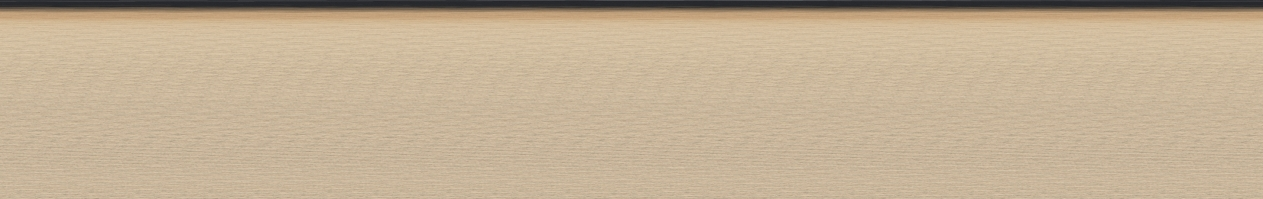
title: Dream Journey among Rivers and Mountains, no. 90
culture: China, Qing dynasty (1644-1911)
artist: Cheng Zhengkui (Chinese, 1604–1676)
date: 1658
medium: Handscroll; ink and color on paper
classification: Painting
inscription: 江山臥遊圖其九十, 青溪道人, 戊戌夏五。 [印] 程正揆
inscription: Title and inscription by Huang Yi 黃易 (1744–1802), and 3 seals.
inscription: 1 colophon and 9 additional seals: 3 seals of Dai Zhi 戴植 (active about 1821–1850); 1 colophon, dated 1914, and 3 seals of Yan Shiqing 顏世清 (1873–1929); 3 seals of Wang Nanping 王南屏 (1924–1985).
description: Cliffs and waterfalls interspersed with trees and dotted vegetation are spread over this handscroll. Long paths wind their way through villages, beside cottages, shrines, and over bridges. In the past, Chinese literati officials liked to take a “dream journey” along mountains and rivers when viewing landscape paintings in their studios. Scenery of this kind thus became a way to escape from the world of bureaucracy and administration. The painter Cheng Zhengkui used the title “Dream Journey” for a whole series of paintings, of which this is number 90. He is said to have painted 500 of them, but the actual count remains unknown.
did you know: Cheng Zhengkui planned to make 100 dream journey paintings but may have ultimately made 500.